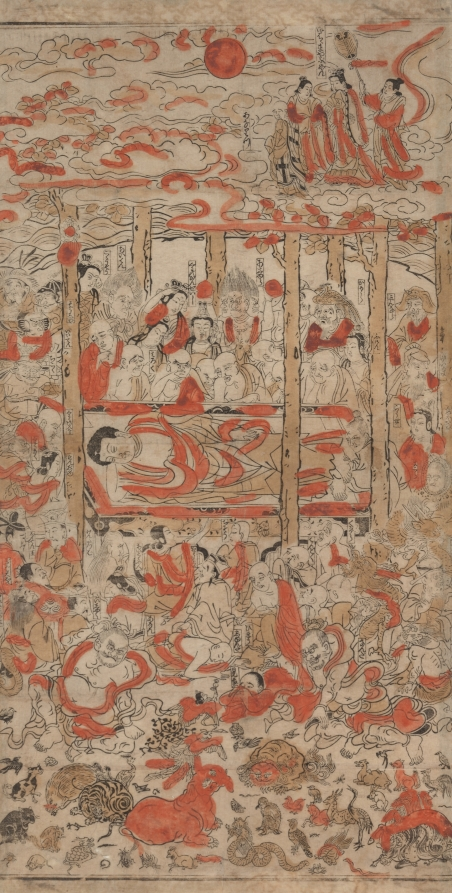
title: The Parinirvana of the Buddha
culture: Japan, Edo period (1615–1868)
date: c. 1710s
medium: color woodblock print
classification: Print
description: This print records a religious rather than secular event, depicting the transition of the historical Buddha Shakyamuni from mortal to eternal being. On a cloudy night under a full moon, the Buddha lies on a platform on his right side with his right hand behind his head. His followers surround him in various states of grief, curiosity, or calm acceptance. An old woman at the Buddha’s feet and other lay believers are present, along with a host of Buddhist deities. The Buddha’s mother, two attendants, and a monk appear at the upper right. The multitude of animals acknowledges that the Buddha’s law applies to all living creatures. Note that various rectangular cartouches identify the followers. This rare image is the earliest hand-colored print in the museum collection. It was hand-colored in yellow and red (tan), and in many instances, the coloring does not follow the outlines of the key block. All printed versions of this subject are based on earlier paintings; the earliest woodcut of this event dates to 1402.